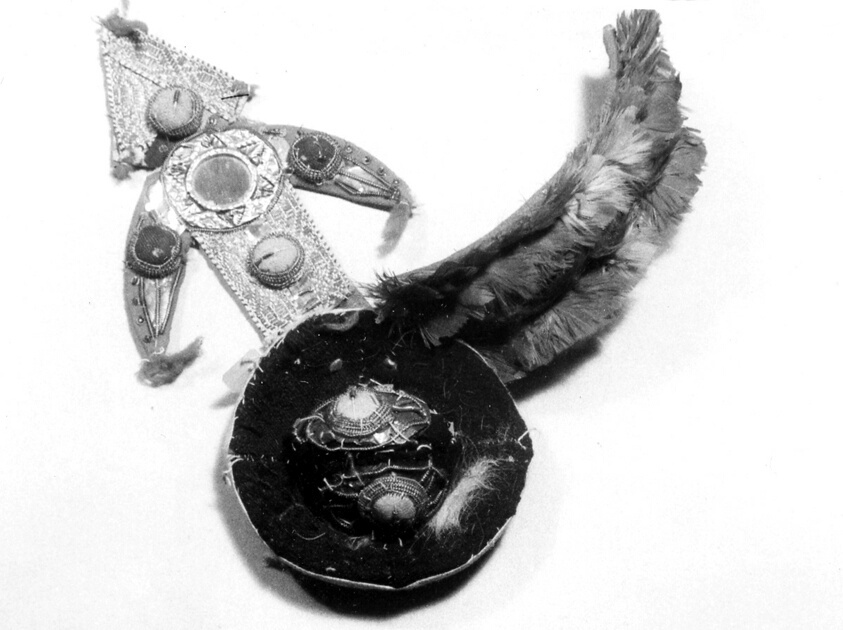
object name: Costume and Accessories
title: Dancer's Ornament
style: moche, andean, andes, Pre-Columbian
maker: Moche (Peru)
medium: Miniature hat with attached bird and feather ornaments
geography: Peru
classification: textile; costume accessory - miscellaneous; costume accessory; costume